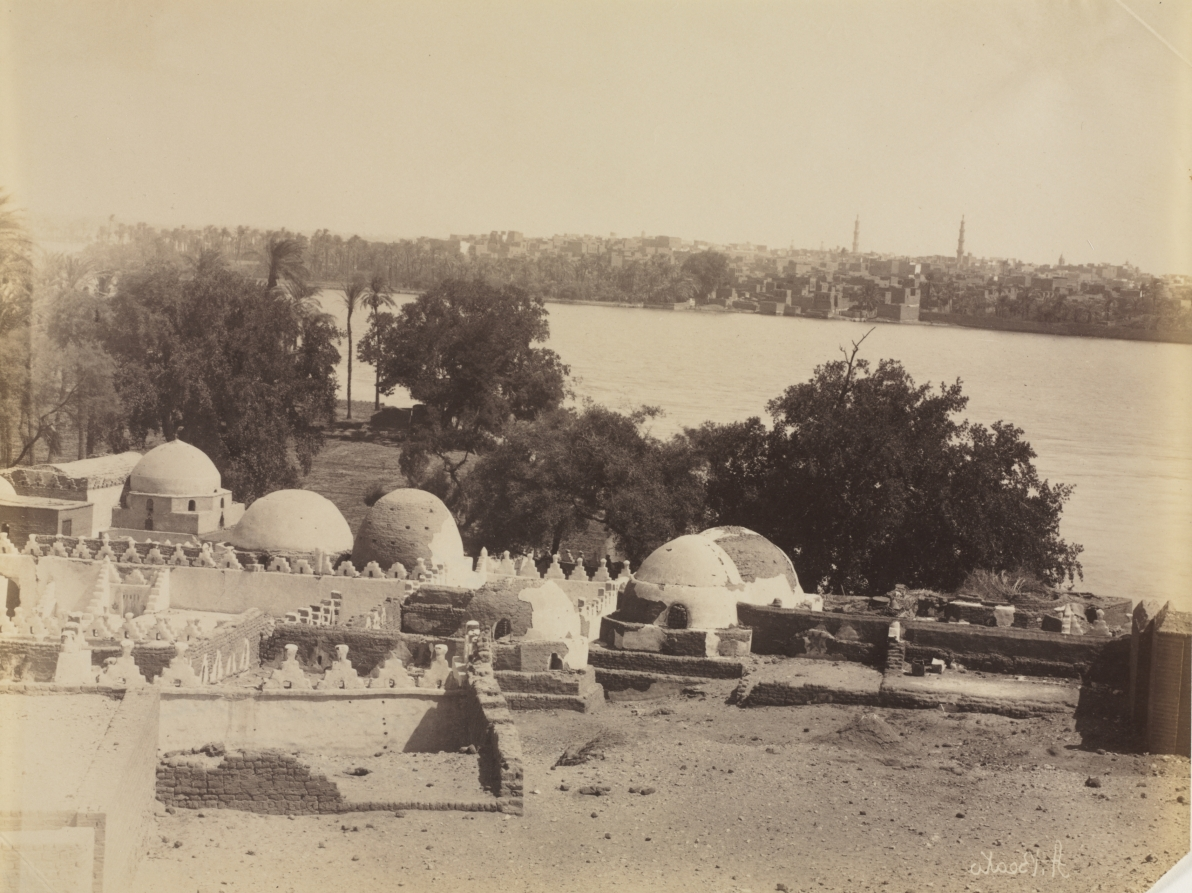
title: Asyut, View from the Mountain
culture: England, 19th century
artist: Antonio Beato (British, c. 1825–1903)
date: c. 1870s -1880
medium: albumen print from wet collodion negative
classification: Photograph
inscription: Written in reverse on recto of negative: "A Beato [signed]"; written in pencil on verso: "368/Assiout/vue prise de la montagne"; "AB-5286-Z"; "SIOUT"